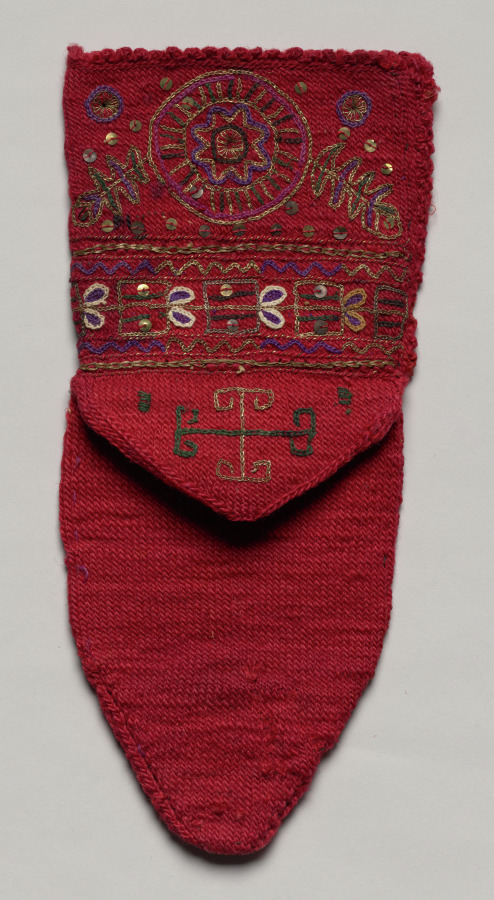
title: Woman's Bridal Socks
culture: Yugoslavia, Serbia, 20th century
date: early 1900's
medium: embroidered wool, gold thread, sequins, knitting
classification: Knitting